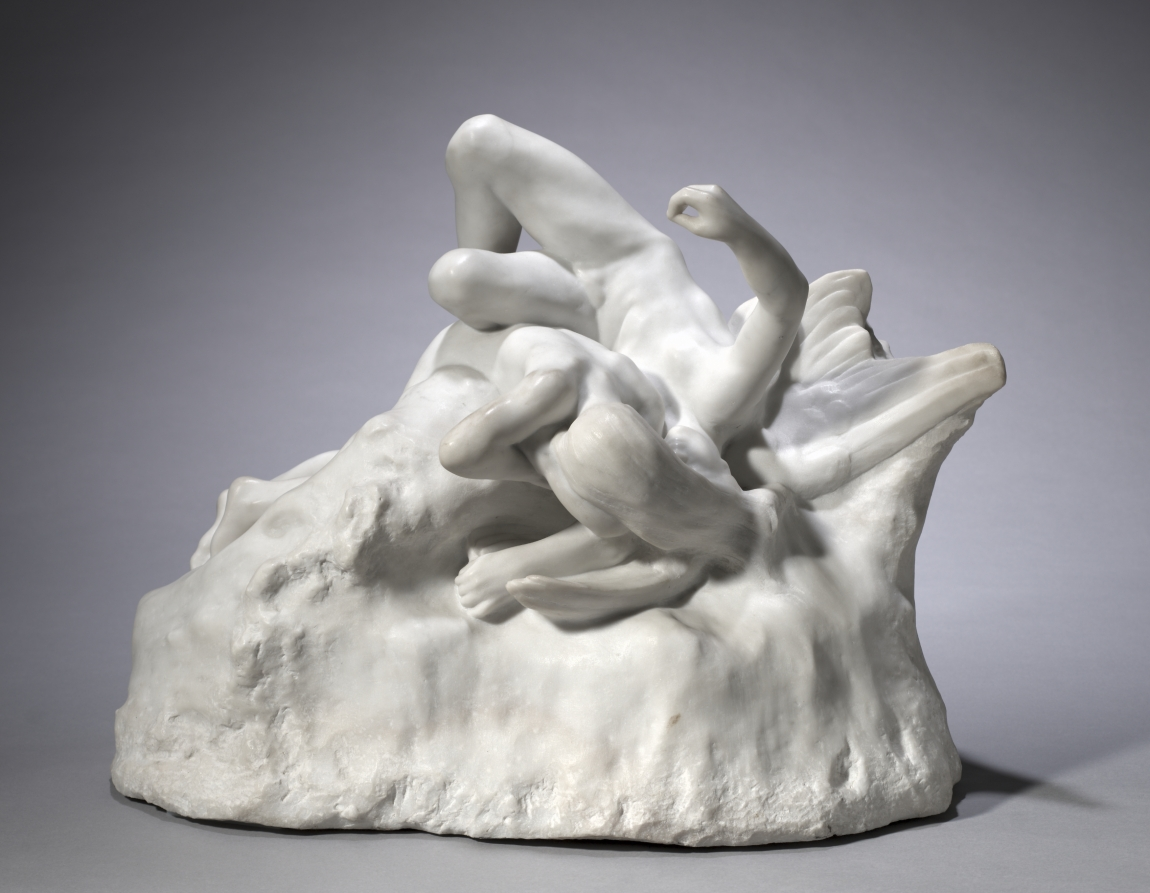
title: The Fall of the Angels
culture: France, late 19th-early 20th Century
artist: Auguste Rodin (French, 1840–1917)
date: c. 1890–1900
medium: marble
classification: Sculpture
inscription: signed under dexter wing of male figure: A. Rodin.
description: The entwined couple in this sculpture recalls the figures on Rodin’s monumental doorway The Gates of Hell. Struck by Dante Alighieri’s descriptions of the damned suffering in hell because of their sins of the flesh, Rodin populated his portal with embracing lovers symbolic of carnal desire and sensual pleasure. Here, a winged figure alludes to the biblical account of the angels who were cast out of Heaven after siding with Satan (Revelation 12:4). Rodin preferred marble for erotic subjects. The juxtaposition between the smooth, sensual surfaces of the figures and the rough-hewn areas below gives the impression that the couple is blossoming into life from hard, lifeless stone.